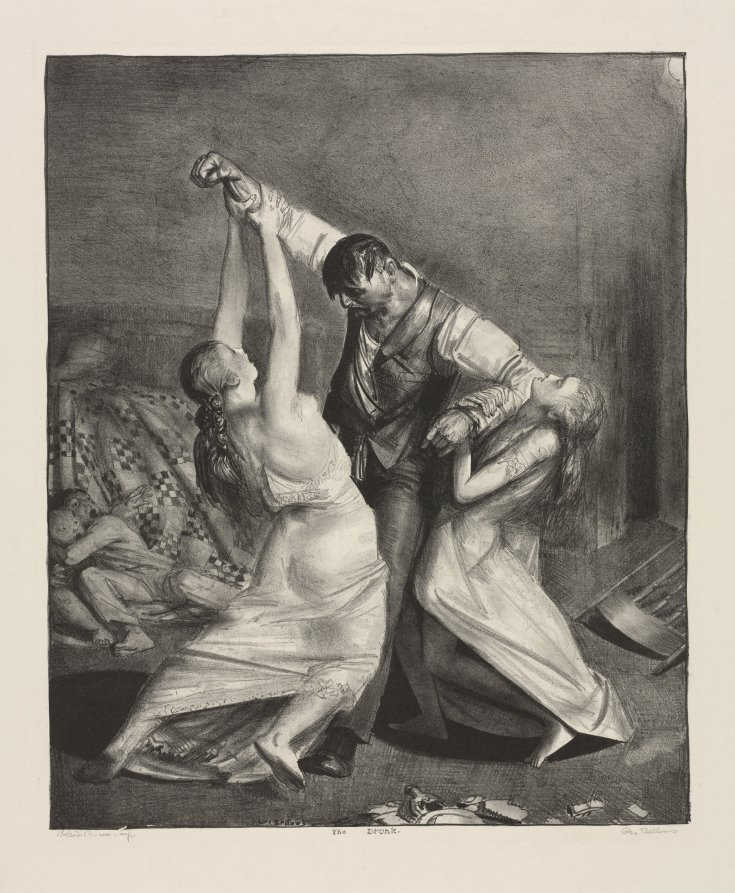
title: The Drunk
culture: America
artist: George Bellows (American, 1882–1925)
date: 1924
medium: lithograph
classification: Print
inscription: Imprinted in margin, center, recto: "The Drunk."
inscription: In graphite, lower right, recto: "Geo. Bellows"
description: George Bellows made this lithograph as an illustration for an article in support of Prohibition published in Good Housekeeping by American suffragist Mabel Potter Daggett. Supporters of Prohibition, which had gone into effect in 1920, believed that alcohol was responsible for many societal problems, including physical violence. In this distressing image, a drunken father confronts his wife with a fist, while a daughter steps in to help and children cower in the corner. Bellows’s strong triangular composition reveals his fascination with an artistic theory called “dynamic symmetry,” in which geometry is used to promote continuity, flow, and balance.